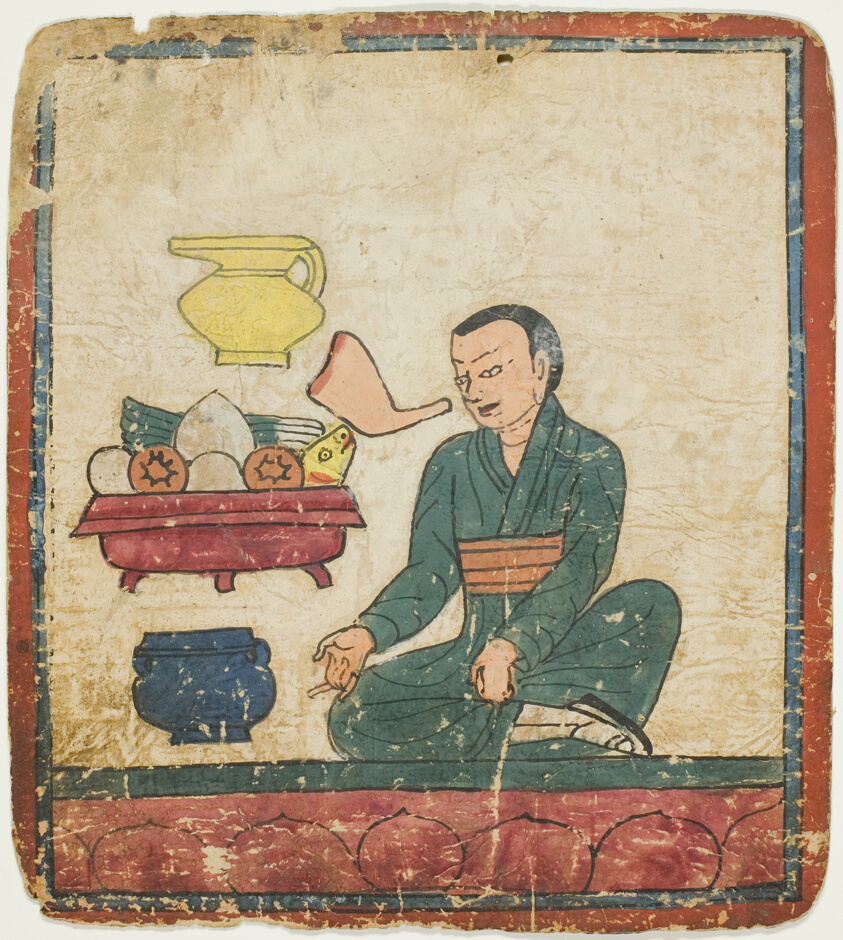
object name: Painting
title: Presentation of Offerings, from a Set of Initiation Cards (Tsakali)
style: Himalayan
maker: Southern Tibet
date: 14th/15th century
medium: Ink and watercolor on paper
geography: Tibet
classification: ink; painting